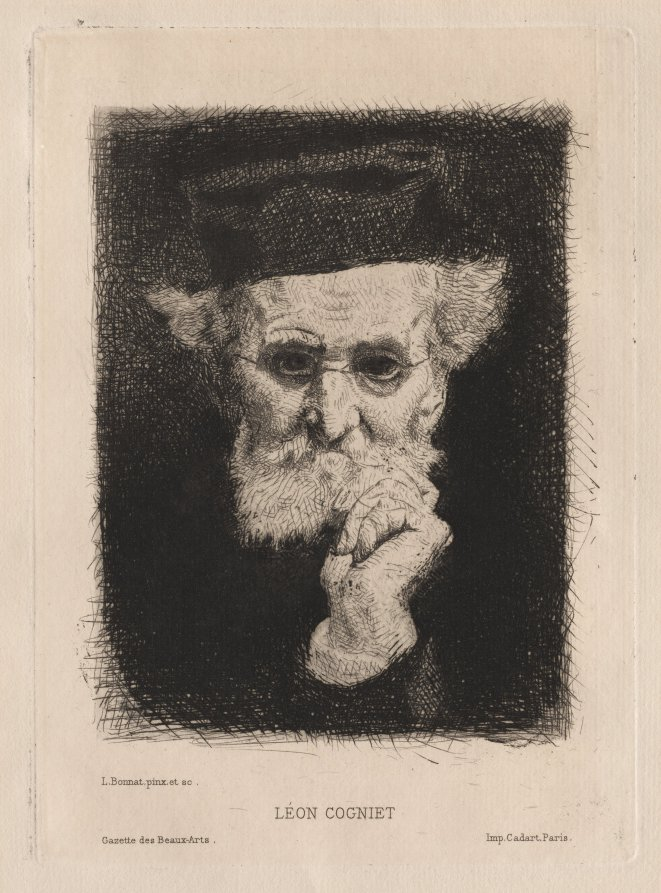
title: Léon Cogniet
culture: France, 19th century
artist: Léon Bonnat (French, 1833–1922)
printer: Alfred Cadart (French, 1825–1875)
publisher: Gazette des Beaux Arts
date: 1881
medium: etching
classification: Print